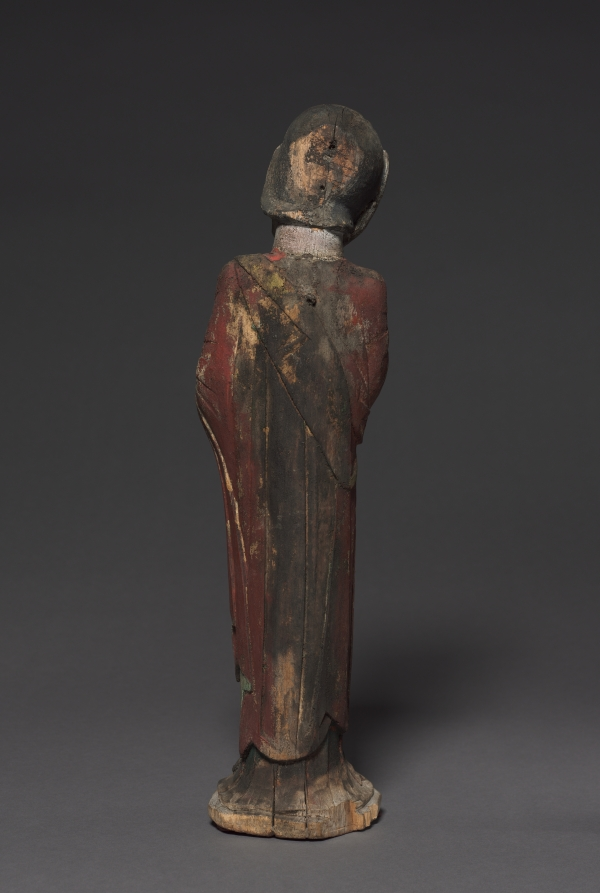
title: Mourning Saint John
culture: Austria, Region of Salzburg, Lungau?, 13th century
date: c. 1240–1260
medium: painted wood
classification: Sculpture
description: These traditional devotional figures at one time formed a Crucifixion group with a Crucified Christ (now lost). The ensemble may have been mounted high above the entrance to the sanctuary of a church on a barrier called a rood beam, beyond which lay people were not allowed. Crucifixion groups were common in medieval churches where they symbolized the sacrifice and real presence of Christ in the Mass.